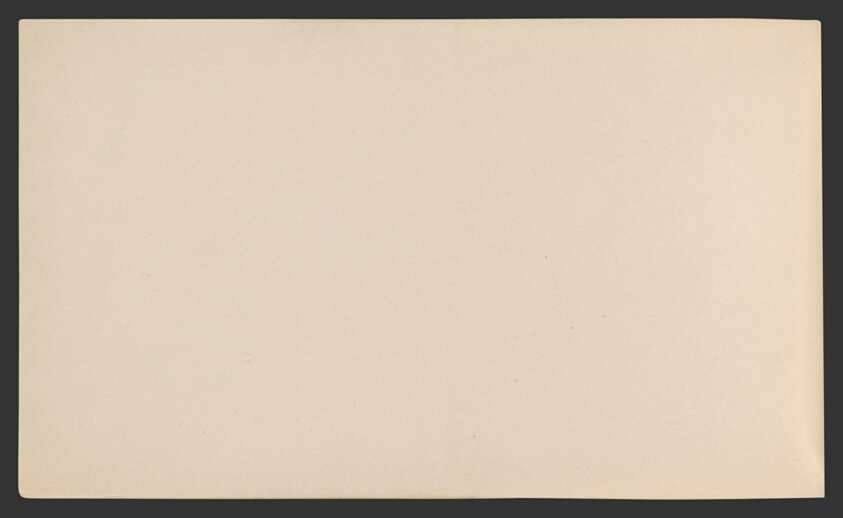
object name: Drawing and Watercolor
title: Sketchbook No. 2 (L'Estaque)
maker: Paul Cézanne; French, 1839-1906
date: 1875–86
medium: Graphite and pen and ink drawings on paper, bound into a book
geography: France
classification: sketchbook; graphite; prints and drawing; paper